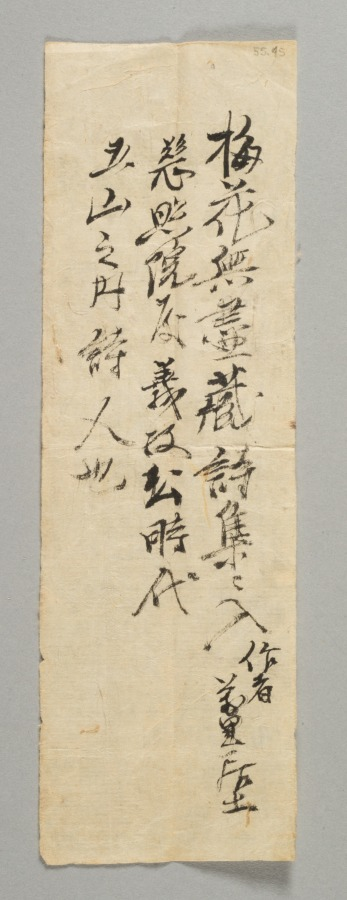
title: Lonely Temple and Towering Cliff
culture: Japan, Muromachi period (1392–1573)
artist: circle of Kenkō Shōkei (Japanese, active 1478–1506)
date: c. 1480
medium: hanging scroll; ink and slight color on paper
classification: Painting